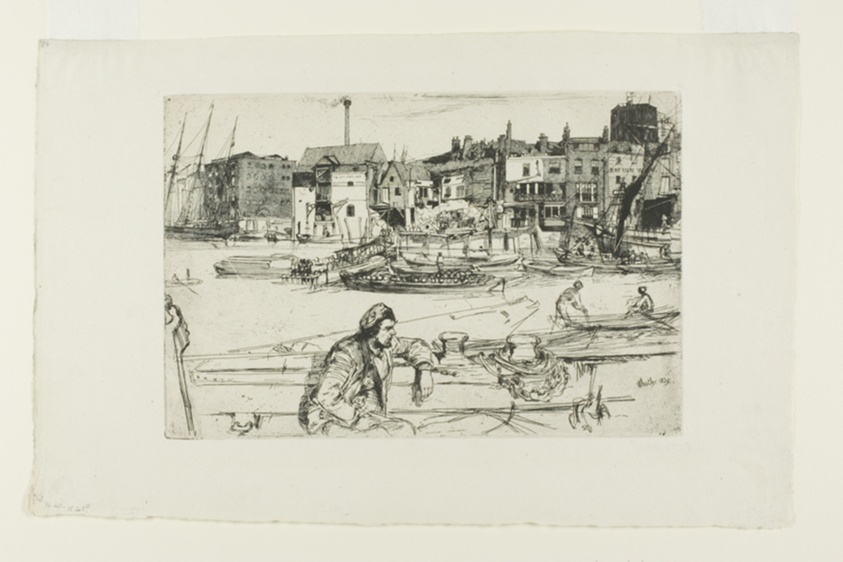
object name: Print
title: Black Lion Wharf, from A Series of Sixteen Etchings of Scenes on the Thames (the "Thames Set")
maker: James McNeill Whistler (American, 1834-1903)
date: 1859, published 1871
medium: Etching with foul biting in black on off-white laid paper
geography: United States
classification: etching; foul biting; print; prints and drawing; paper